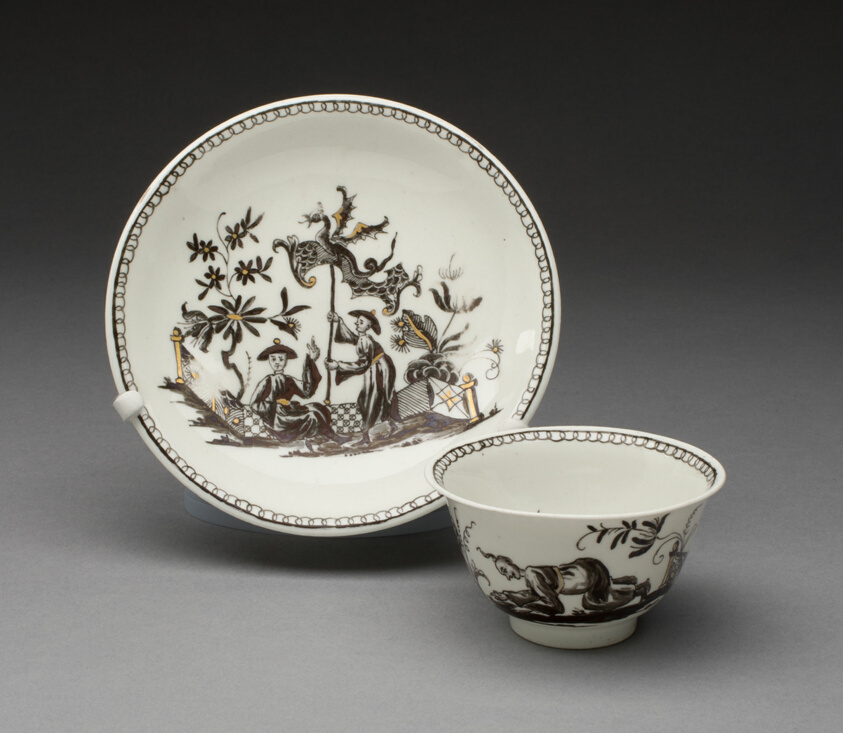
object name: Ceramics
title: Tea Bowl and Saucer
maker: Du Paquier Porcelain Manufactory (Austrian, 1718-1744)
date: c. 1730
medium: Hard-paste porcelain, black monochrome, and gilding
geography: Vienna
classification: drinking vessel; porcelain; european decorative arts; ceramics